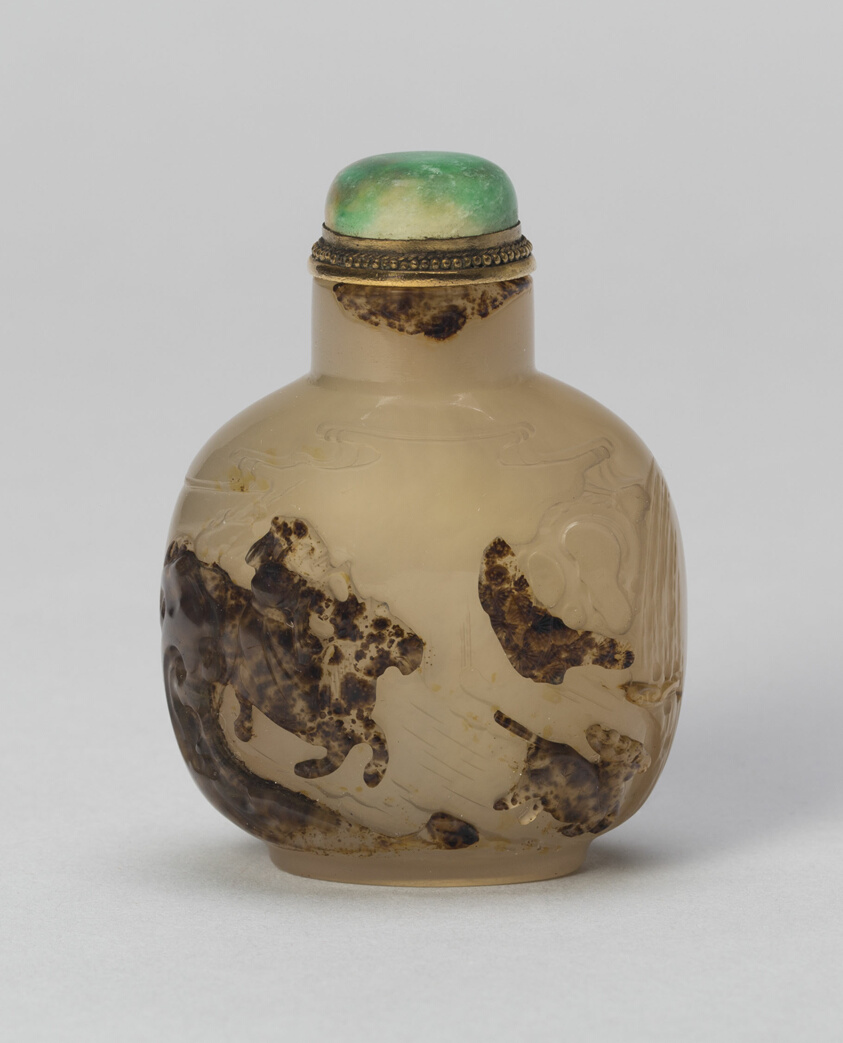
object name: Vessel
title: Snuff Bottle with an Equestrian Archer Chasing a Deer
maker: China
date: Qing dynasty (1644–1911), 1750–1800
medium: Suzhou shadow agate with carved decoration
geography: China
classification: snuff bottle; asian art; vessel